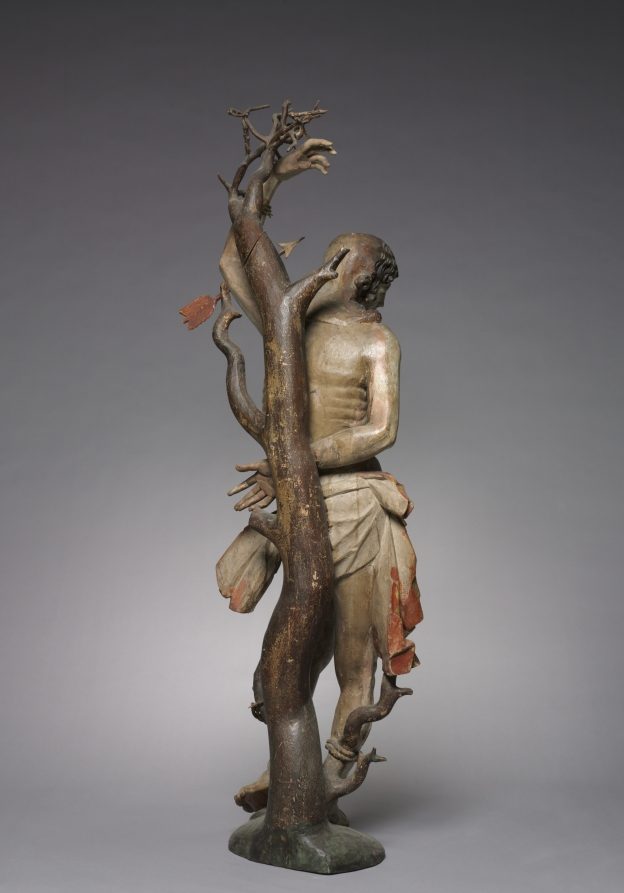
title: Saint Sebastian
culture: Germany, early 17th century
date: c. 1600–1620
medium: painted and gilded wood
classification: Sculpture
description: An early Christian saint and martyr, Sebastian was condemned to death by the Roman emperor Diocletian. Bound to a tree and shot with arrows, he survived—only later to be martyred by beating. This figure embodies the blend of stylistic influences that characterized German sculpture in the early 1600s. The graceful pose and anatomical naturalism of the legs indicate the influence of Italian Mannerism, while the crisp, stylized patterns of Sebastian’s hair and loincloth recall German Gothic works from the 1400s. The tree to which Sebastian is bound is an actual branch, shaped and refined to its present appearance.